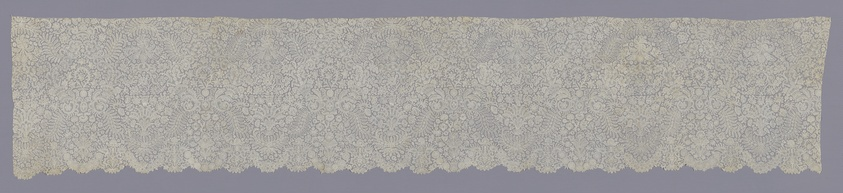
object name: Textile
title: Lace Flounce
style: 18th Century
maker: Brussels, Flanders (present day Belgium)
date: 1720–40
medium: Linen, bobbin part-lace of a type known as "Brussels" with a plaited bar ground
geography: Flanders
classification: textile; lace - bobbin; costume - lace